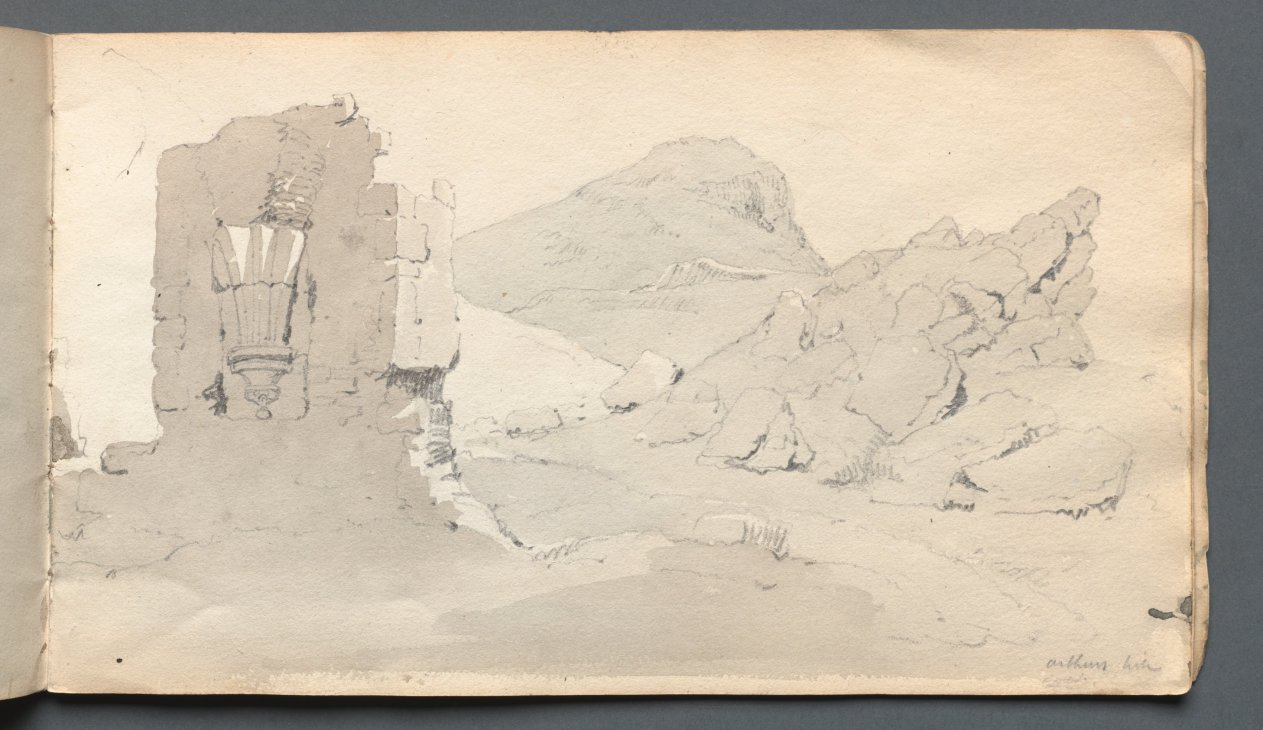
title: Sketchbook: "Ruin"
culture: England, 19th century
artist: Samuel Prout (British, 1783–1852)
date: 1814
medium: graphite with gray and tan wash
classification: Bound Volume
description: John Ruskin (also in this gallery) admired Prout’s strength as a draftsman. Like the topographical watercolorists of the 18th century, Prout emphasized form over color in his watercolors, as is evident in the monochromatic, delicate English views in this sketchbook.